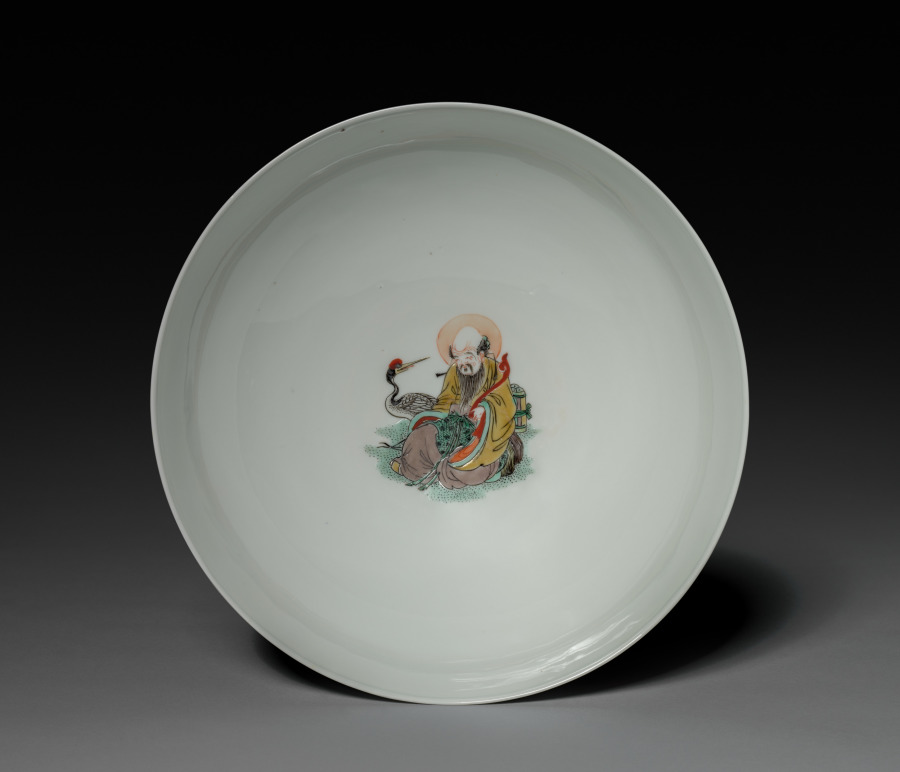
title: Bowl with Eight Immortals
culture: China, Jiangxi province, Jingdezhen kilns, Qing dynasty (1644-1911), Kangxi reign (1662-1722)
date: 1662–1722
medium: porcelain with famille verte overglaze enamel decoration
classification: Ceramic